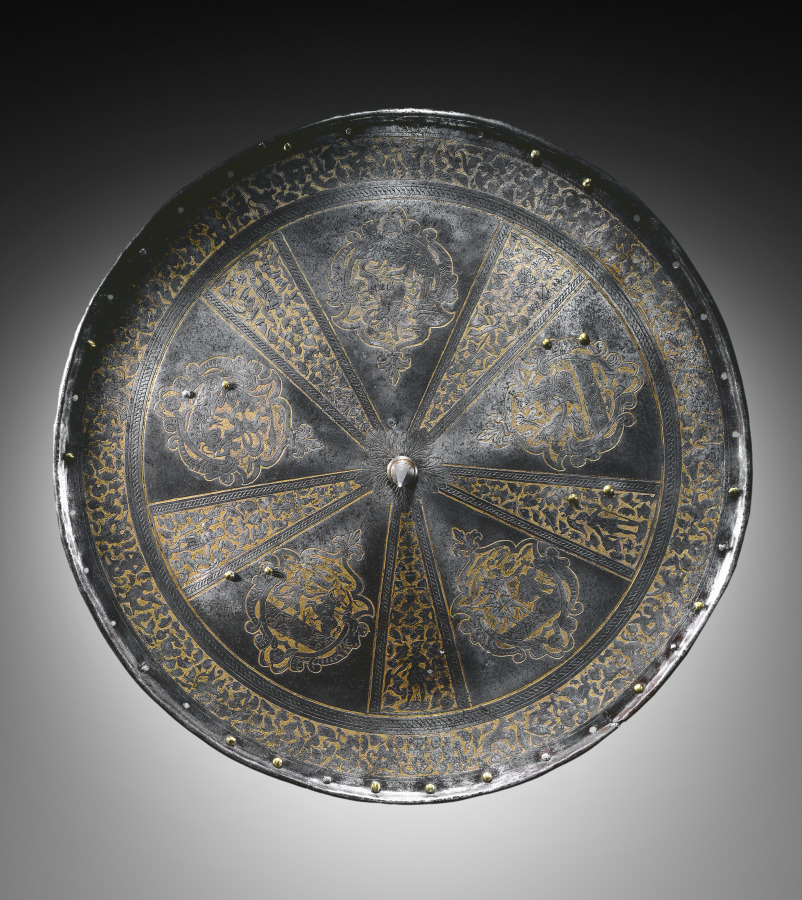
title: Rondache (Round Shield)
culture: Italy, Milan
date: c. 1570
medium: etched and gilded steel with brass rivets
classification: Arms and Armor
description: Highly decorated circular shields like this one were a specialty of the city of Milan. This shield would have originally belonged to an armor that would have been decorated to match - with radiating etched bands of classical warriors and trophies.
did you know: The escutcheons, or small shields radiating around the center, contain scenes of mythical combat; during the Renaissance there was often a preoccupation with the antique world.